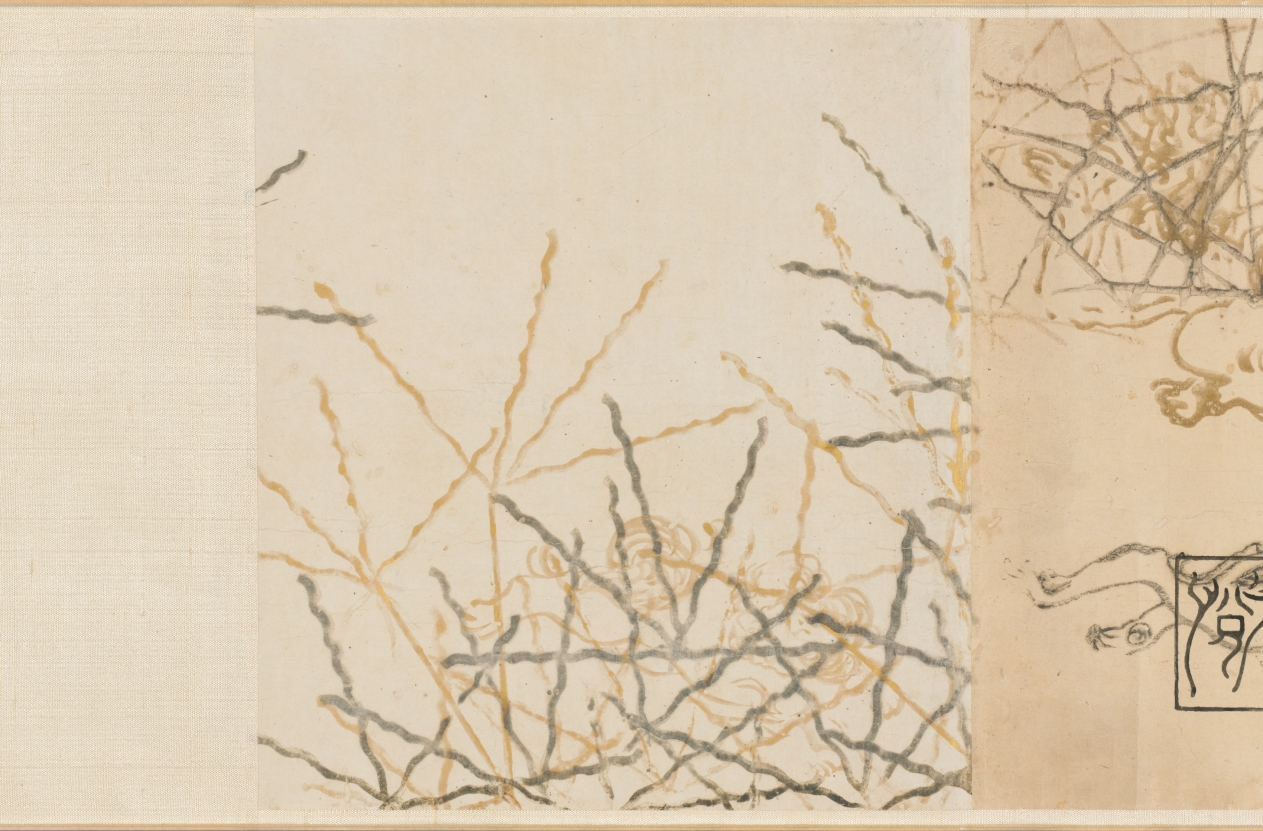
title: Selections from the New Collection of Japanese Poems from Ancient and Modern Times (Shinkokin wakashū) with Printed Designs of Chinese Lions and Crab Finger Grass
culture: Japan, Edo period (1615–1868)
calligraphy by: Hon'ami Kōetsu (Japanese, 1558–1637)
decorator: Tawaraya Sōtatsu (Japanese, c. 1570–c. 1640)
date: early 1600s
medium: handscroll; ink, gold, and silver on paper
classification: Calligraphy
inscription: Seal: 光悦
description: Hon’ami Kōetsu was a calligrapher and craftsman who frequently collaborated with the painter Tawaraya Sōtatsu, considered the first master of the Rinpa school. Kōetsu brushed seven poems from the autumn section of a poetry anthology onto dyed paper with motifs designed and printed in gold and silver by Sōtatsu.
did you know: Before becoming a master painter of screens, Tawaraya Sōtatsu painted fans.